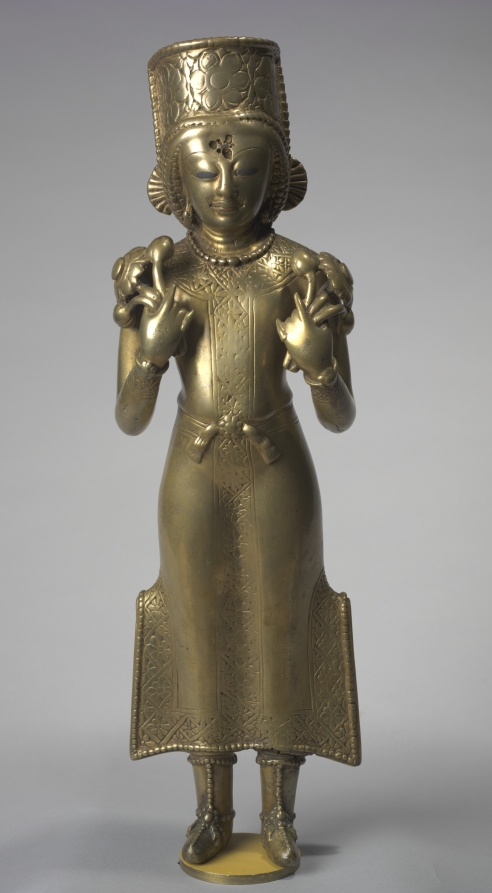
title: Surya, the Sun God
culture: India, Kashmir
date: early 700s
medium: brass with inlaid silver eyes and copper inlaid lips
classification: Sculpture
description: Surya wears a long tunic and boots suitable for riding horses across the grassland steppes of Central Asia. The sun god was of paramount power among the people of Central and Western Asia who followed religions such as Zoroastrianism, a pre-Islamic faith emphasizing a sacred duality between light and dark. When the image of the sun god began to be made in India from the 100s BC on, he is shown in the dress of the people who revered him the most. Surya is worshipped throughout the Indian subcontinent and Himalayan regions of Kashmir and Nepal alongside both Hindu and Buddhist deities.